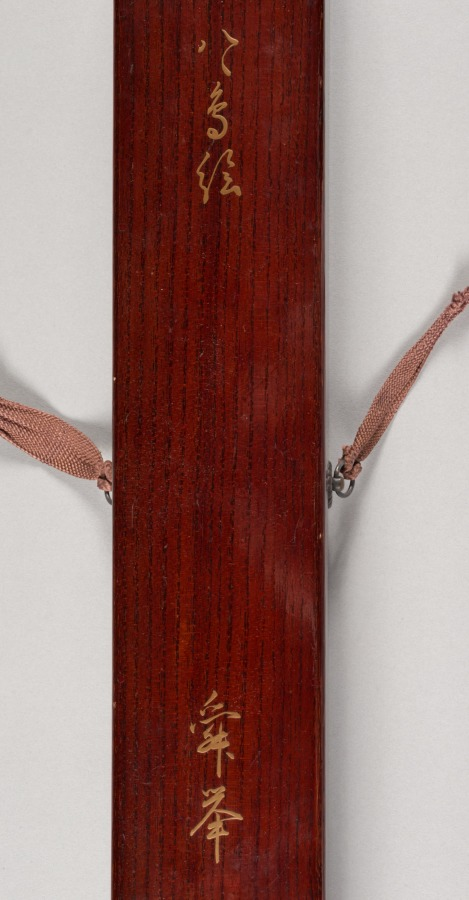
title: Crow on a Pomegranate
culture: Japan, Muromachi period (1392–1573)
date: 1500s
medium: hanging scroll; ink on paper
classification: Painting